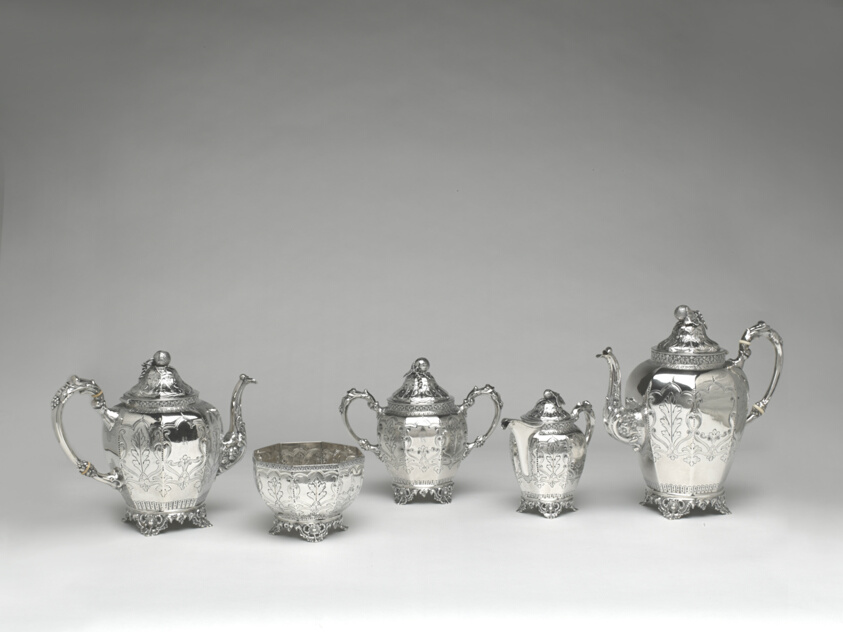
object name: Metalwork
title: Slop Bowl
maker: J.T. and E.M. Edwards; American, 1852–1864; Chicago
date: 1852–64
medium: Silver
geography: Chicago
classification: slop bowl; silver; american decorative arts; american arts; decorative arts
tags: Chicago